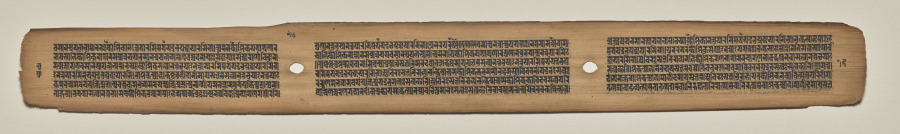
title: Text, Folio 16 (verso), from a Manuscript of the Perfection of Wisdom in Eight Thousand Lines (Ashtasahasrika Prajnaparamita-sutra)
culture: Eastern India, Bihar, Vikramashila Monastery. Painting: Nepal, Kathmandu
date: Sunday, September 14, 1119 (year 239 of the Newar Samvat in the month of Ashvina)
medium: gum tempera and ink on palm leaves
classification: Painting